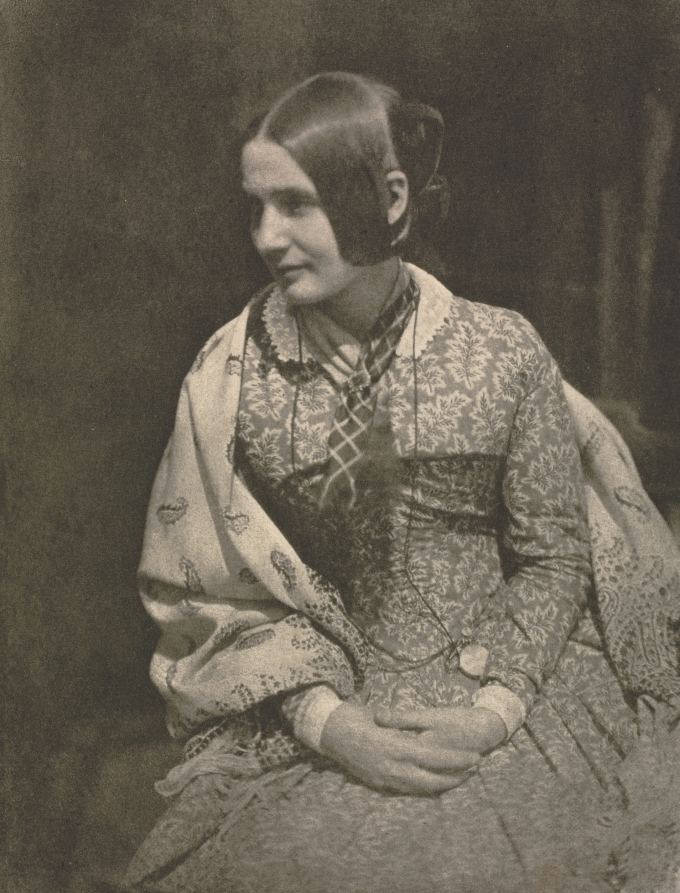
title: Camera Work: Lady in Flowered Dress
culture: England, 20th century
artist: David Octavius Hill (British, 1802–1870)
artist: and Robert Adamson (British, 1821–1848)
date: 1912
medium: photogravure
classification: Bound Volume